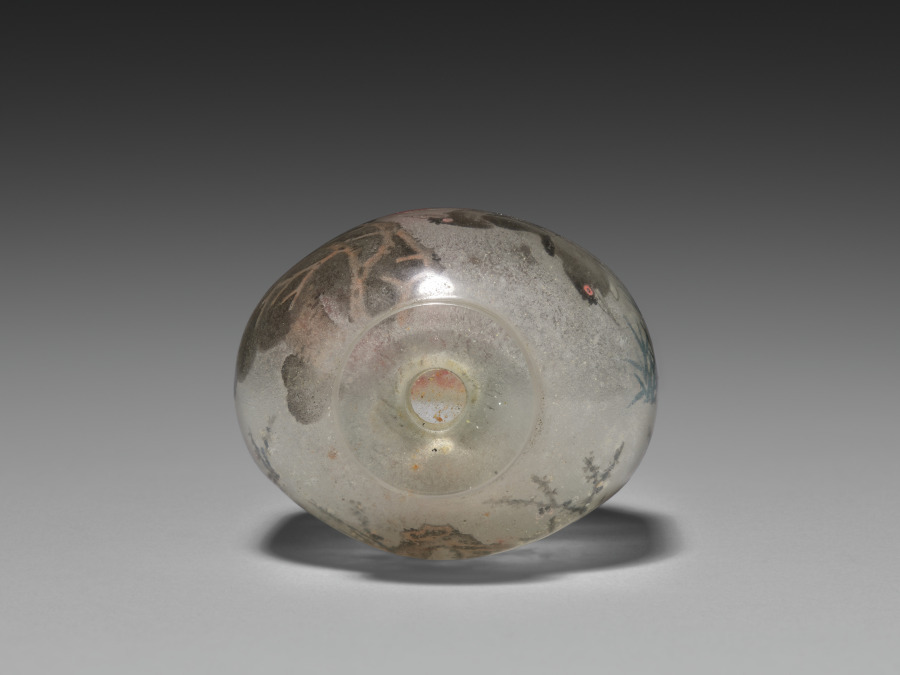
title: Snuff Bottle with Stopper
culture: China, Qing dynasty (1644–1911), Qianlong reign (1736–95)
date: 1736–95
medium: crystal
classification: Stone